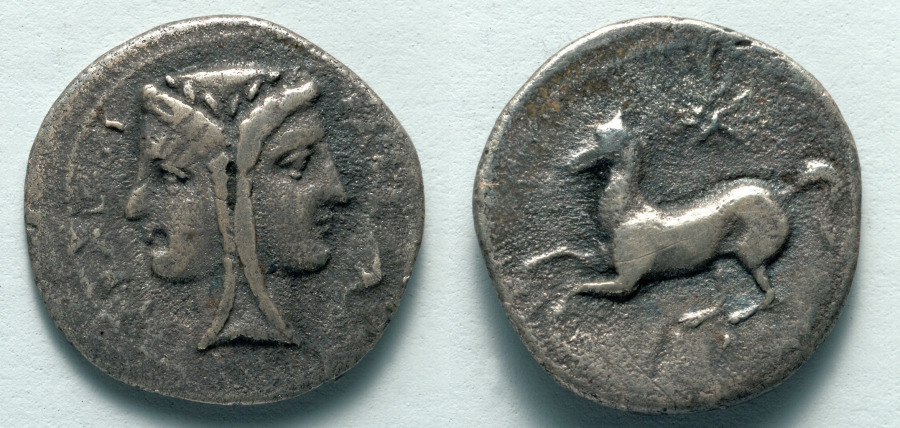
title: Two Litrae: Janiform Head (obverse); Horse (reverse)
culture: Greek, minted at Syracuse (Sicily)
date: 344–317 BCE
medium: silver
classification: Coins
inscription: ΣΥΡ[ΑΚΟΣΙOΝ]